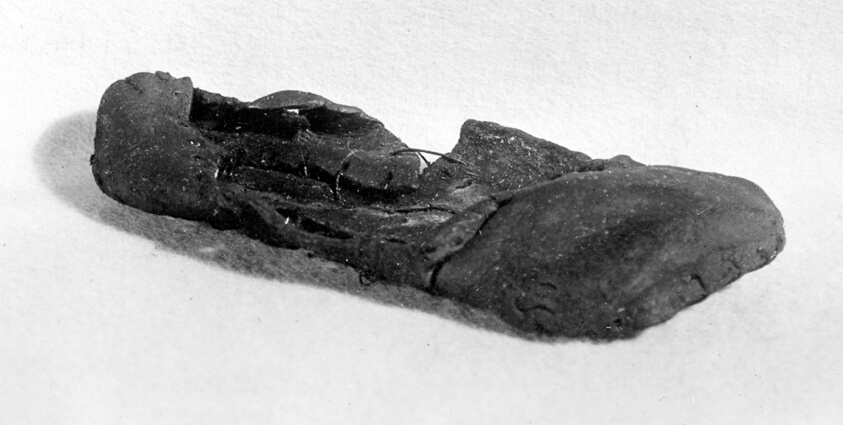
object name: Costume and Accessories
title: Child's Shoe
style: elizabethan, tudor, european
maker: England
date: 16th century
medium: Leather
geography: England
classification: textile; costume accessory - shoe; shoes - misc; costume; dress (garment); clothing